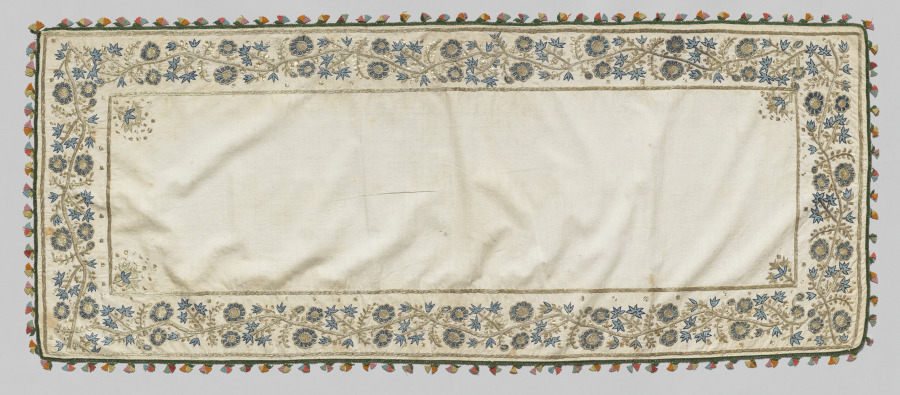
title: Garment or furnishing textile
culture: Africa, North Africa, Tunisia, Tunisian embroiderer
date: early 1900s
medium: Linen, silk, metal, dye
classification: Embroidery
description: Artistic trends and fashions circulated widely during the late 1800s and early 1900s. The embroidered floral borders and delicate trim on this woven linen textile resembles those made across the Ottoman Empire's territories in the eastern Mediterranean. At this time, Tunisia was ruled by the Husaynid dynasty, which was loosely affiliated with the Ottoman court.